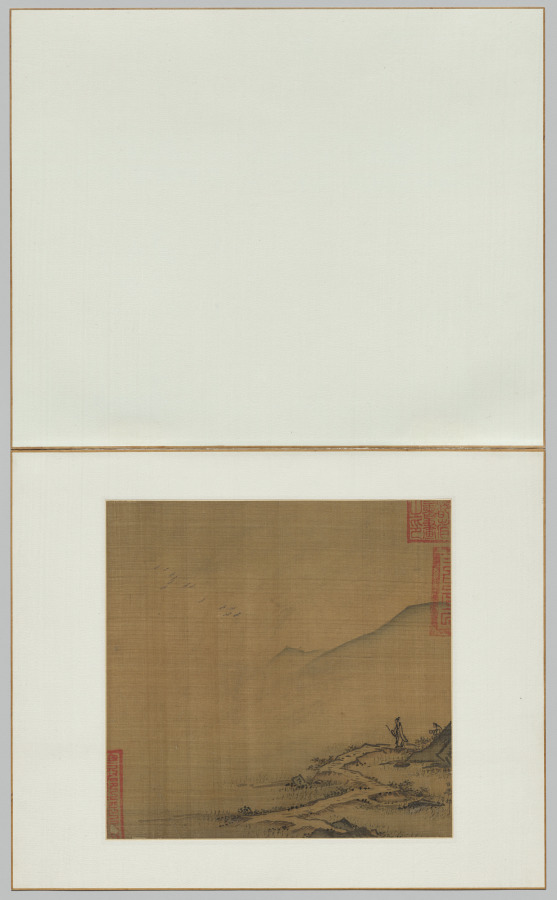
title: Landscape with Flying Geese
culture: China, Southern Song dynasty (1127-1279)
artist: Ma Lin (Chinese, c. 1185–after 1260)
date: mid-1200s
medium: Album leaf; ink and slight color on silk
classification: Painting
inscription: 臣馬麟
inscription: 3 half-seals: 1 official seal of Yuan Dynasty; 1 of Ming imperial collection (used 1372-84); 1 official seal of Ming Dynasty.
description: This minimalist landscape places most of the representational elements in the lower right foreground. A lone gentleman strolls along a zigzagging path by the water. With the gentleman’s staff acting as a visual cue, the viewer’s gaze is directed to geese flying over distant mountains. The scene of a marshland, with its wet and soft ground dotted with vegetation, suggests springtime in Jiangnan. Combined with the flying geese, the album evokes the poetic lines: By spring fields, geese are about to return, Under chilly waters, fish are submerging. 春郊欲回雁, 寒水正沉鱼